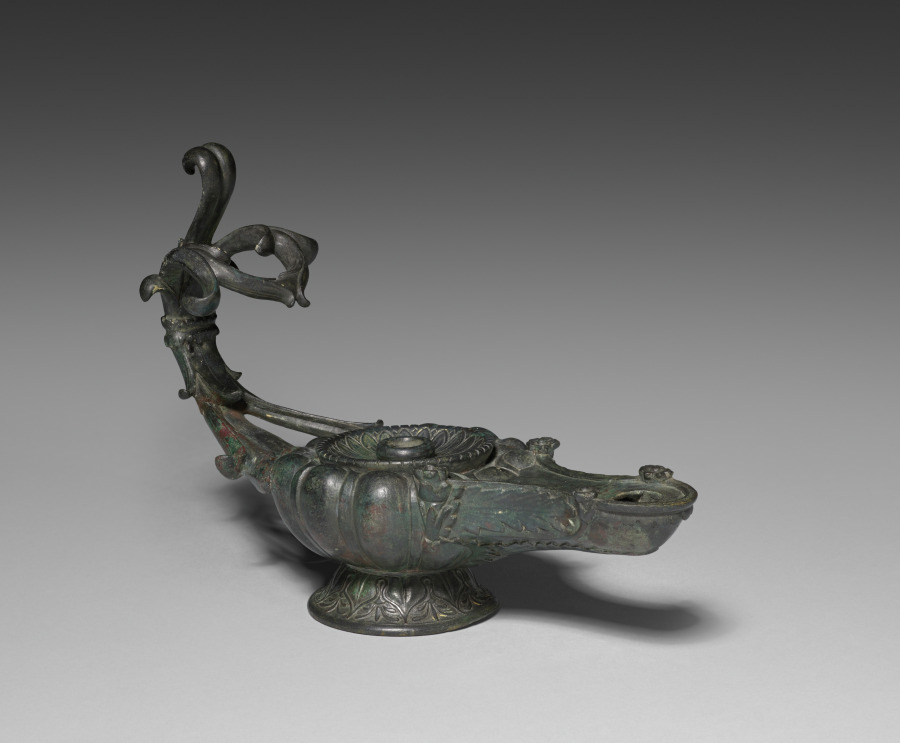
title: Oil Lamp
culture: Roman, late Republican-early Imperial (c. 50 BCE – 50 CE)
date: c. 50 BCE–50 CE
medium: Bronze, cast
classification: Metalwork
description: This large and ornate cast bronze oil lamp features a central hole for filling and a single spout for its wick. Its extravagant handle rises to create both a loop and a sort of hook, one or both of which may have served to suspend the lamp when lit. Alternatively, the lamp may have stood on its own, perhaps atop a tall lampstand. While its primary function may have been for lighting dark spaces, this lamp must also have served an ornamental purpose.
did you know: When used, this lamp likely hung from the ceiling or stood on a tall lampstand.